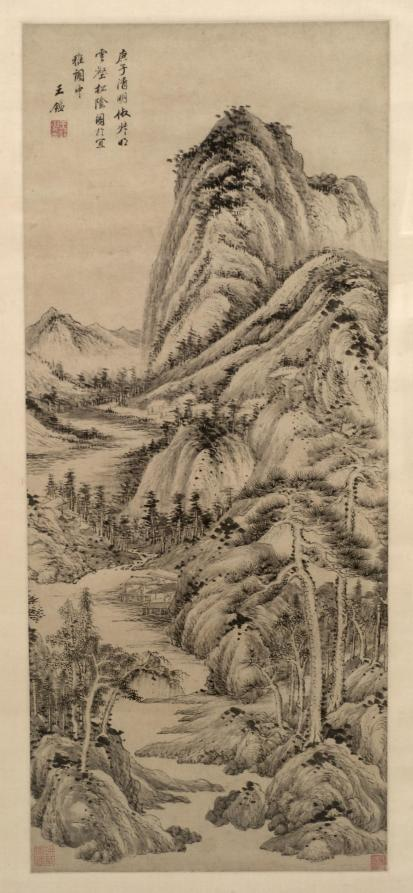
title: Shade of Pines in a Cloudy Valley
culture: China, Qing dynasty (1644-1911)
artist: Wang Jian (Chinese, 1598–1677)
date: 1660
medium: Hanging scroll; ink on paper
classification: Painting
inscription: Artist's inscription, signature, and seal: Painted at Yiyage in imitation of Wang Meng's Shade of Pines in a Cloudy Valley during the Qingming Festival of the gengzi year [1660]. Wang Jian [seal] Wang Jian zhi yin.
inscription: 2 additional seals: 1 of Bi Long 畢瀧 (18th c.); 1 unidentified.